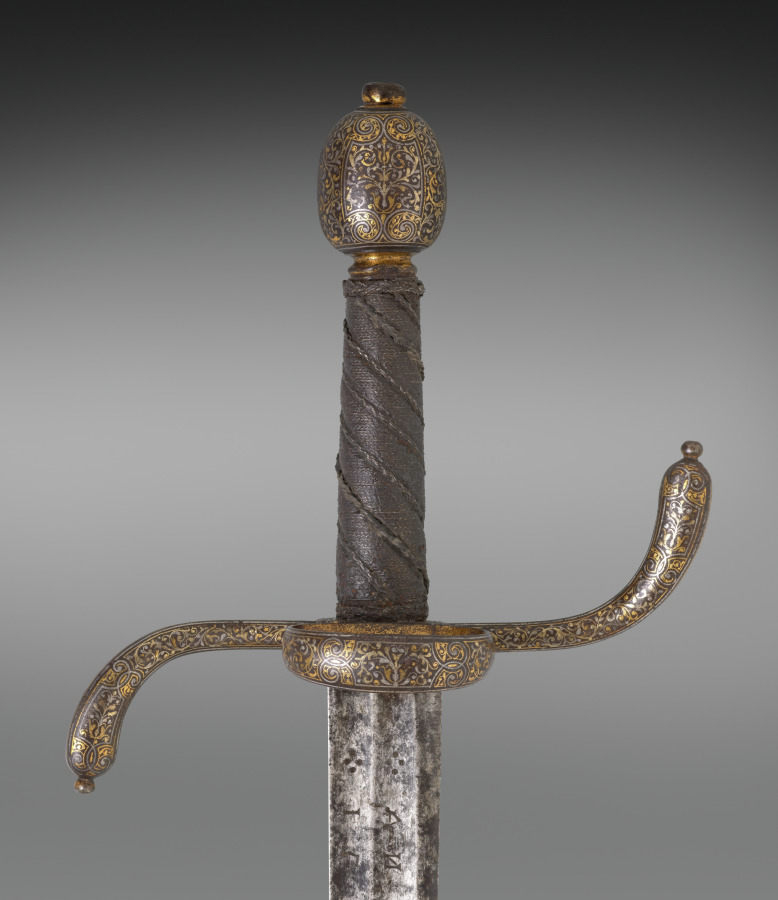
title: Hanger (Hunting Sword)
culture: Hilt: Italy (?); Blade: Germany, Saxony, late 16th-17th Century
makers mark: Jaspar Bongen the Younger (German, active late 1600s)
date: late 1600s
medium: steel; gold and silver damascened hilt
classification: Arms and Armor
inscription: "1553" (Presumed to be a commemorative date)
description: Damascening, the technique of hammering gold and silver wires into grooves cut to receive them, enlivens this sword's hilt. Further texture was added with wires to improve the user's grip, which allowed him to hunt with more control and accuracy. Hunting was a popular sport among the wealthy and many nobles owned tracts of forest, but peasants were prohibited from hunting on these lands.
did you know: The swordsmith's mark, a crowned stag visible on the blade below the hilt, is unidentified.